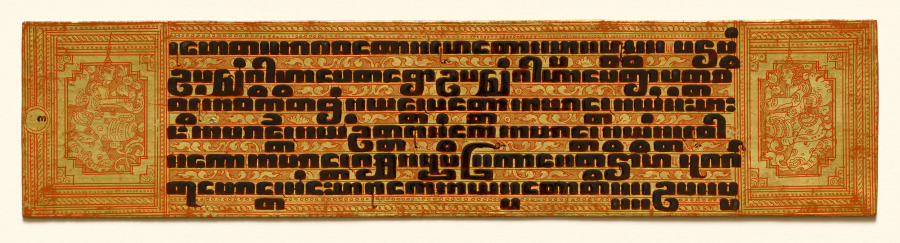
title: Text and illumination, folio 1 (verso) from a Kammavacha: Buddhist ordination text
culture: Myanmar (Burma)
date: 1800s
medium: Leaf: lacquer and gilding on cloth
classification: Manuscript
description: In premodern Burma, lay people commissioned lavishly ornamented manuscripts for ceremonial occasions, when officiants would read aloud from the text. Written in black lacquer, the text is in the language of Pali written in a Burmese script. It contains ordination rites and procedures for monastic ceremonies. The second to last page is covered with intricately drawn, winged celestial beings (nats) in gestures of praise. They fly amid intertwining vegetation—denoting bounty—that grows from serpentine forms that refer to rain clouds. Lionlike forms inhabit the space with them. The top and bottom covers are equally ornamented with jeweled floral patterning.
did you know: The Pali text of this manuscript is written in Burmese square script, which is also known as "tamarind seed script."